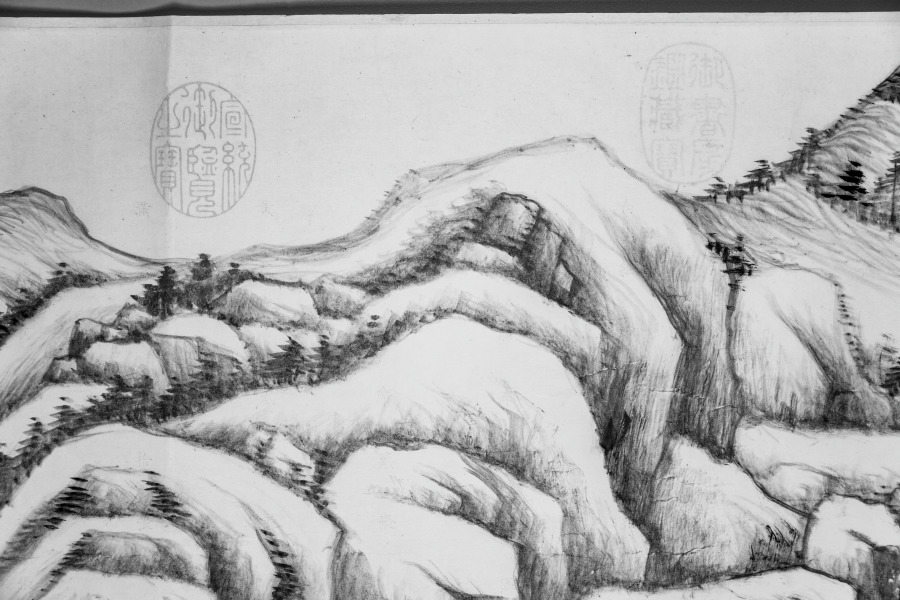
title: River and Mountains on a Clear Autumn Day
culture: China, Ming dynasty (1368–1644)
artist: Dong Qichang (Chinese, 1555–1636)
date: c. 1624–27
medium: Handscroll; ink on Korean paper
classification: Painting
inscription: 黃子久江山秋霽似此，當恨古人不見我也。思翁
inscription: 董文敏每遇高麗鏡面箋，書畫尤為入神。此卷改表紙用之，字跡隱然，兼有朝鮮之印。至於筆法圓秀，真接倪黃。豈文沈所可同日而語也。 康熙庚午中秋後一日，天氣澄爽，重裝初畢，跋於瓶廬。抱瓮翁高士奇。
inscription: Second inscription by Gao Shiqi 高士奇 (1645–1704): On the twenty-third day of the ninth month, the jiaxu year of the Kangxi era [1694], I packed my bags to head north. When my boat passed Wuchang [Suzhou], Mr. Mantang [Song Luo] brought wine to bid me farewell so that we could share our thoughts on our separation in the last few years. I showed him the paintings and calligraphy which I collected and asked his opinions. Since Mr. Mantang does not own any handscrolls by Wenmin [Dong Qichang], I leave this one for him in commemoration of our parting; thus the painting will have a worthy owner and our meeting will become a beautiful story in the future. It is the fourth day after the beginning of winter, with the sky clear and sober. Trees under frost have turned red and yellow, seemingly echoing the brush and ink in the painting. I also ask Mr. Mantang to inscribe a poem to commemorate our meeting so that it will survive forever.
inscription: 1 colophon and 4 seals of Song Luo 宋犖 (1634–1713): Who is the foremost art connoisseur of our dynasty?/ Tangcun [Liang Qingbiao, 1620–1691] is dead, so the title passes to Jiangcun [Gao Shiqi]./ Leaving office, you retired for five years in the Lake region./ Fondling handscrolls and hanging scrolls from morning to evening./ You sent me your collection catalogue Xiao Xia Lu last year;/ It is indeed the true equal of [Zhou Mi's] Yun Yan Guo Yan./ This year you returned to the capital by imperial order;/ Your boat with calligraphy and paintings anchored at the river bank in Suzhou./ When we met each other you did not waste any time for conversation by poured out immediately/ From your "coral net" extraordinary treasures./ You produced incomparable scrolls, with gold-inscribed labels and jade rollers,/ Pouring out from bags and trunks, they were spread in disarray./ Without a word, I rolled and unrolled until my fingers were numbed,/ We sat straight, facing each other quietly, and never felt tired./ For three days we forgot about sleeping and food./ And at times we shouted our joy out loud, forgetting who is host or guest./ Your Dwelling in the Fuchun Mountains and the Yuansheng manuscript/ These peerless works I myself examined with delight./ As an added pleasure to the farewell dinner under the Maple Bridge,/ You allowed me to hold again this handscroll by Dong Qichang--/ The Misty River and Piled Peaks [by Zhao Mengfu] and this Clear Autumn Day are two extraordinary masterpieces./ In showing such life and spirit with "qi yun." the artists were truly "men of heaven."/ The Clear Autumn Day is not even three feet long,/ Painted on tributary Korean paper, it shines like silver./ Every building up and every turn of the mountains imitates nature,/ Every tree and every rock is removed from the commonplace./ From the beginning, the theory of poetry is the theory of painting,/ Like the lotus and the morning sunshine, they complement and refresh each other./ The artist's inscription regrets that "the Old Masters cannot see my scroll."/ Huang Gongwang would have agreed in his grave./ The vermilion of the seals glitter and dazzles the eyes,/ These added accessories are as valuable as jade./ You are very kind to give it to me,/ The feelings expressed in your inscription are so sincere./ Wanting to refuse, but unable, I accept it to respect your wish,/ And taking off my gown and cap I wrapped it with care./ You asked me to write a long poem in commemoration of this beautiful occasion,/ I am too ashamed that my effort in response is so poor and inadequate./ Returning home, I unrolled it under candlelight, trying to write the colophon,/ The light of the waning moon shines at the foot of the mossy wall./ Earnestly humming and brows knit in deep thought, I try to compose;/ The verses are not outstanding, but the facts are real./ With this poem recorded at the end of the scroll, I mail it to you for approval,/ This poem and this painting shall outlast a thousand springs. (Translation by LYSL/HK/WKH)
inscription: 1 colophon and 2 seals of Shao Changheng 邵長蘅 (1637–1704); 2 inscriptions and 14 seals of the Qianlong 乾隆 emperor (r. 1736–95); 1 seal of the Jiaqing 嘉慶 emperor (r. 1796–1820); 3 seals of the Xuantong 宣統 emperor (r. 1908–11); 1 seal unidentified.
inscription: [印] 朝鮮國王之印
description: Dong Qichang had a tremendous impact on the artistic practices and historiography of later generations; his works and writings shaped literati aesthetics. Here, Dong places an abstract landscape composition diagonally across the picture plane, configured to recall earlier masters and simultaneously express his own personal style. Dong’s inscription claims, Huang Gongwang’s Autumn Day, looks like this. I truly regret the master has not seen my work. In fact, Dong Qichang may have had Dong Yuan’s Xiao and Xiang Rivers in mind, a work he owned and considered a key work in Chinese art history.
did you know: The painting has an imprint of a Korean seal that reads "Seal of the king of Joseon."